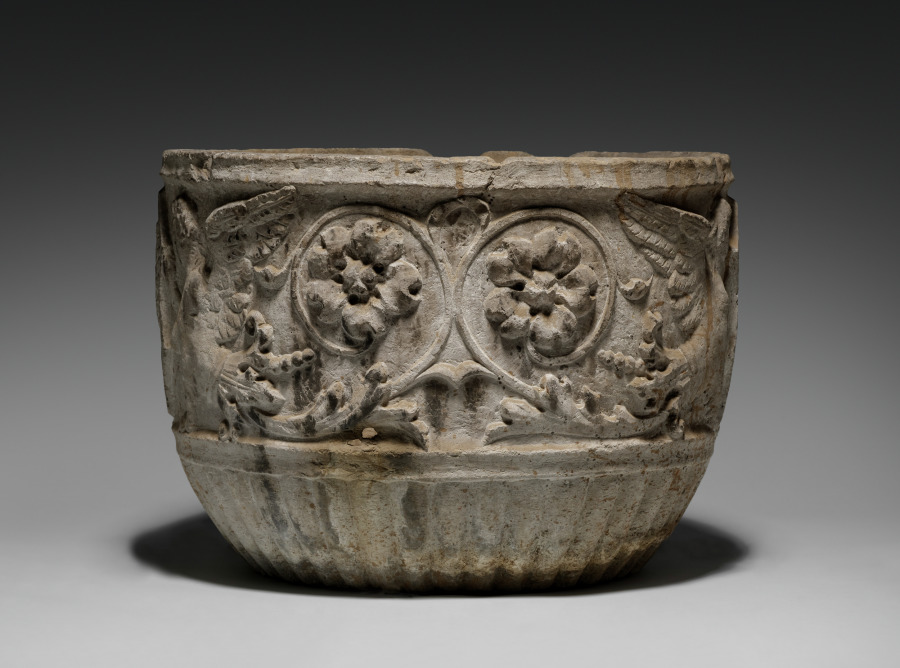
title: Garden Pot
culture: Italy, 19th century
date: 19th Century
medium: stone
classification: Miscellaneous